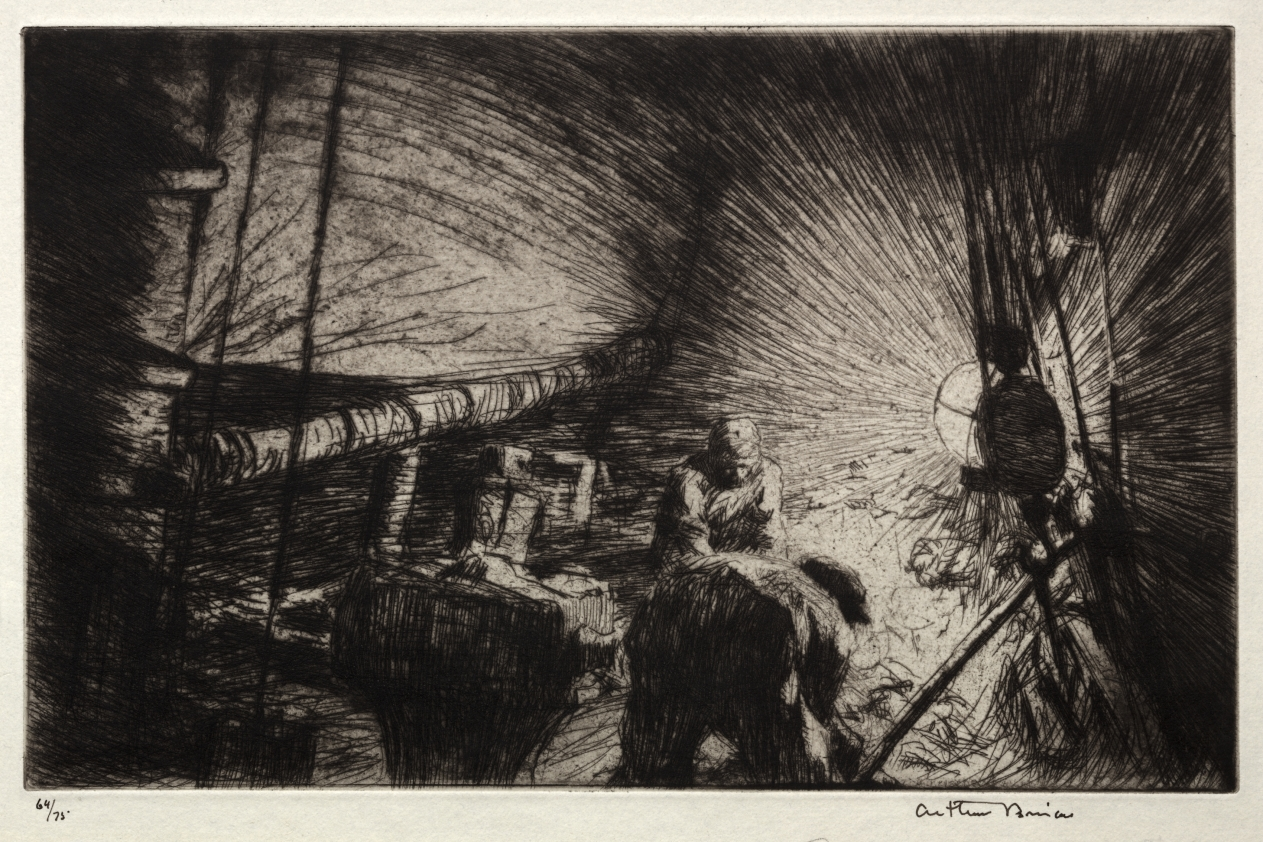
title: Sorting Fish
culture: England, 20th century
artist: Arthur John Trevor Briscoe (British, 1873–1943)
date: 1926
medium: etching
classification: Print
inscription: Lower margin in ink: 64/75 Arthur Briscoe